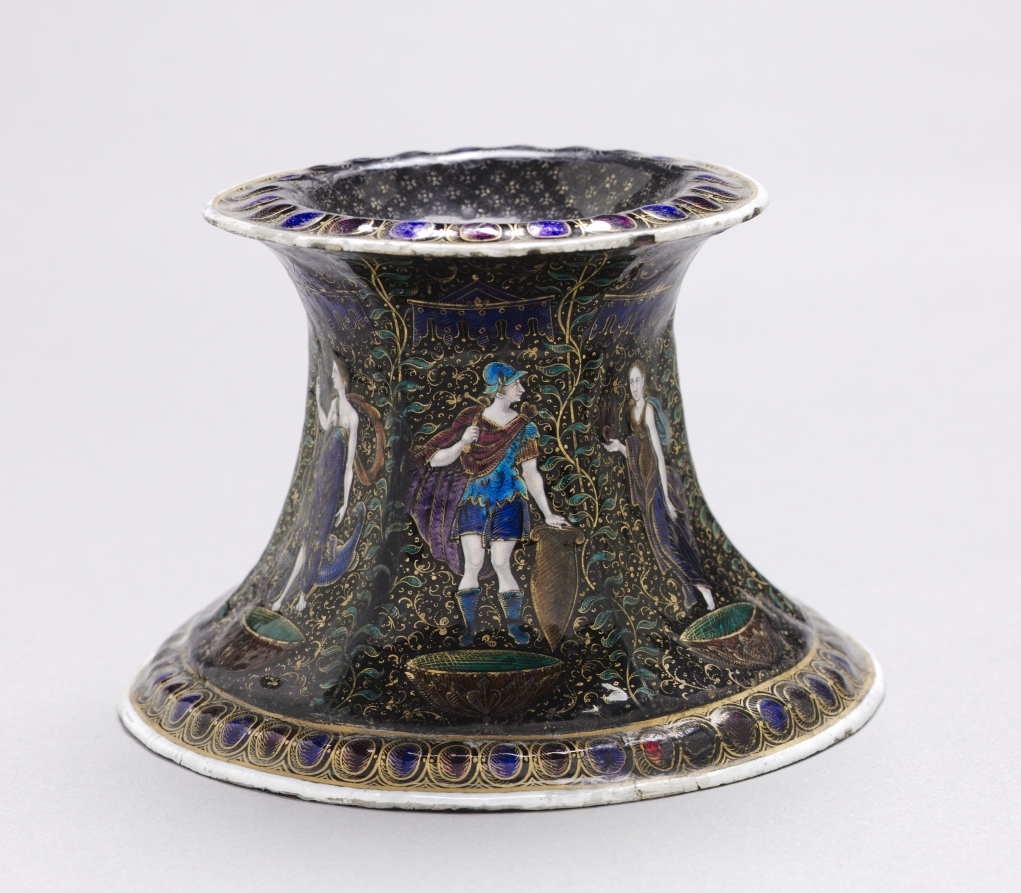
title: Salt Dish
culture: France, Limoges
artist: Jean Limousin (French, 1528–c. 1610)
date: early 1600s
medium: painted enamel on copper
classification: Ceramic